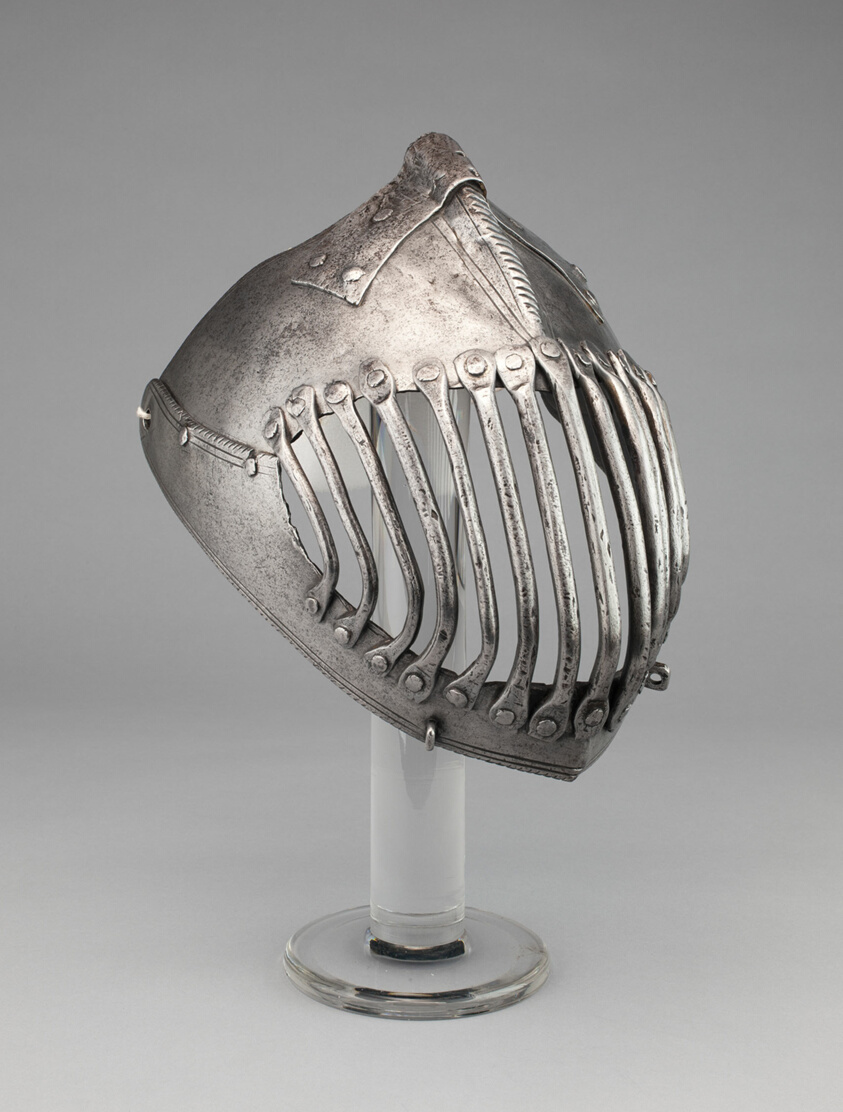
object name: Armor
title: Barred Visor of a Close Helmet for the Gioco del Ponte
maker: Italian; Pisa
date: c. 1600 or later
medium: Steel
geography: Pisa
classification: suit-helmet; armor; arms and armor